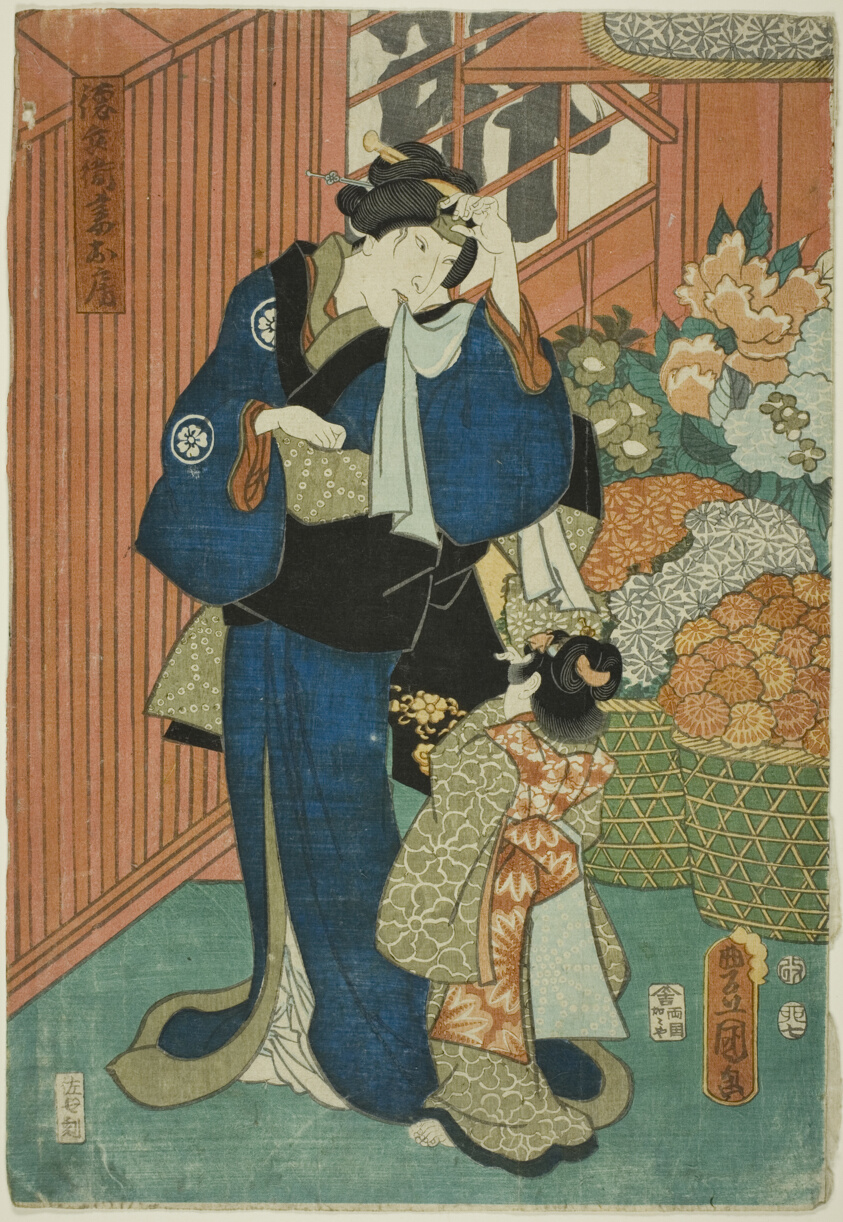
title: Actors Kataoka Gado II as Florist (Hanaya) Tokubei (R) and Nakamura Daikichi III as Tokubei's Wife (Tsuma) Ofusa (L)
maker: Utagawa Kunisada I (Toyokuni III) (Japanese, 1786-1864)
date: 1855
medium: Color woodblock print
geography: Japan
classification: print; asian art